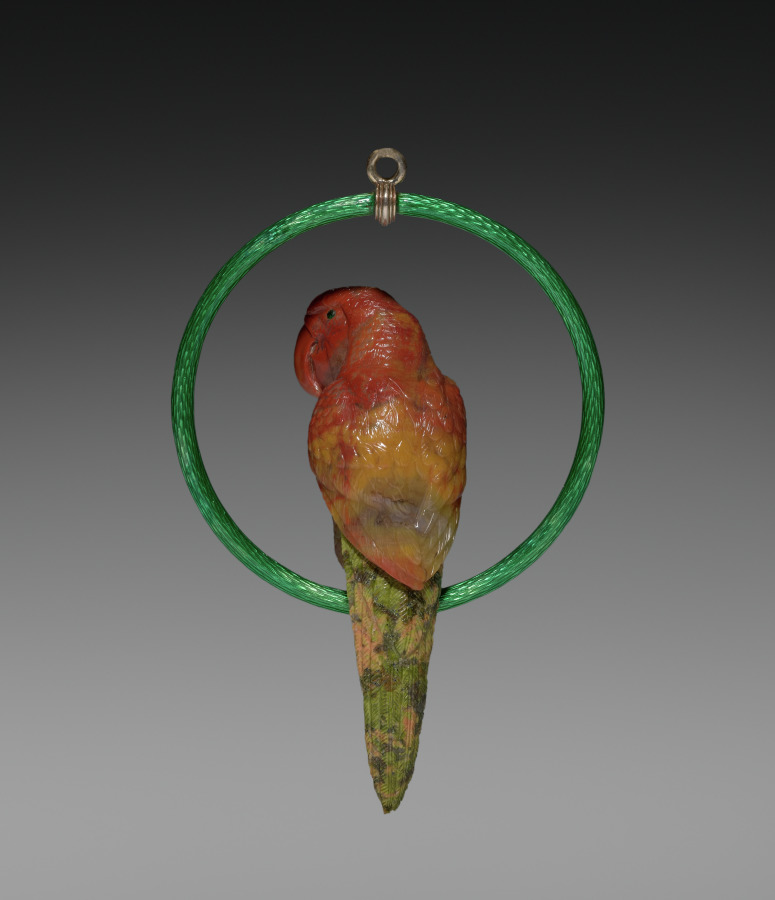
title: Parrot from the Parrot on a Perch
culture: Russia, St. Petersburg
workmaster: Mikhail Evlampievich Perkhin (Russian, 1860–1903)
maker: House of Fabergé (Russian, 1842–1918)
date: 1896–1903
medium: jasper, agate, emeralds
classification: Miscellaneous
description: In creating luxurious accessories for a desk or tabletop, Fabergé often used native hardstones such as multicolored agate and jasper, green nephrite, pink rhodonite, and rock crystal found in the Ural Mountains of western Russia. By paying careful attention to the unique colors and textures of the stones, Fabergé and his craftsmen brought them to life, turning milky agate into a begging poodle or green and black jasper into this parrot. The use of native materials also promoted Russian nationalism, which appealed greatly to the tsar and his family.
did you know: This parrot is part of a figure that includes a perch for the bird to sit upon.